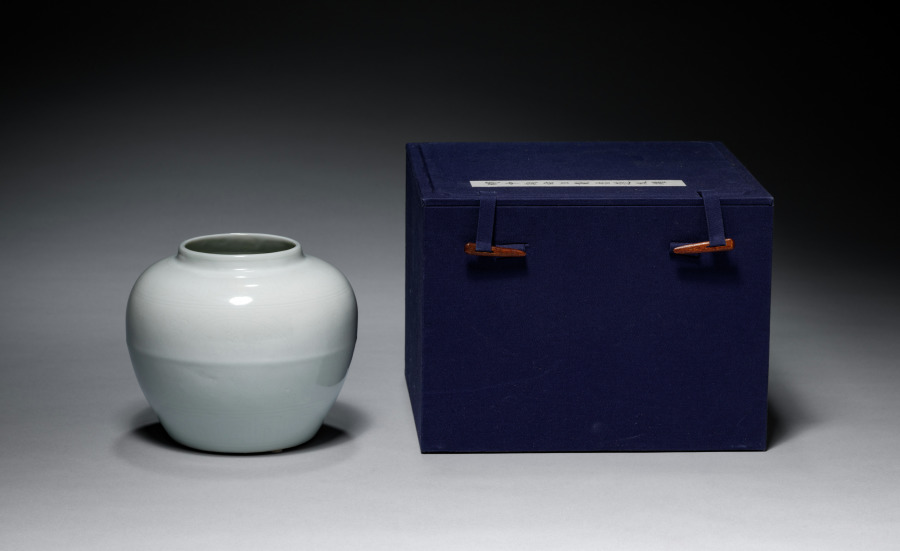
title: White-Glazed Jar with Hidden Design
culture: China, Jiangxi province, Jingdezhen kilns, Ming dynasty (1368-1644)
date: 1500s–1600s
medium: Porcelain with sweet-white (tianbai; 甜白) glaze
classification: Ceramic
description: White was a ritual color used in Buddhist ceremonies, as well as the color of mourning. This jar is made of two molded halves that were joined where the vessel’s middle section shows a raised line. It is covered by a silky white glaze called “sweet-white” (tianbai; 甜白). A “hidden design” (anhua; 暗花) of floral scrolls on the shoulder and stylized petals around the base shine through the glaze. The jar may have been used as a planter, a vase for flowers, or it may have held incense sticks on a home altar.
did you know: Tianbai, or sweet-white glaze, was developed to accommodate the Yongle emperor’s (reigned 1403–24) preference for white ceramics.